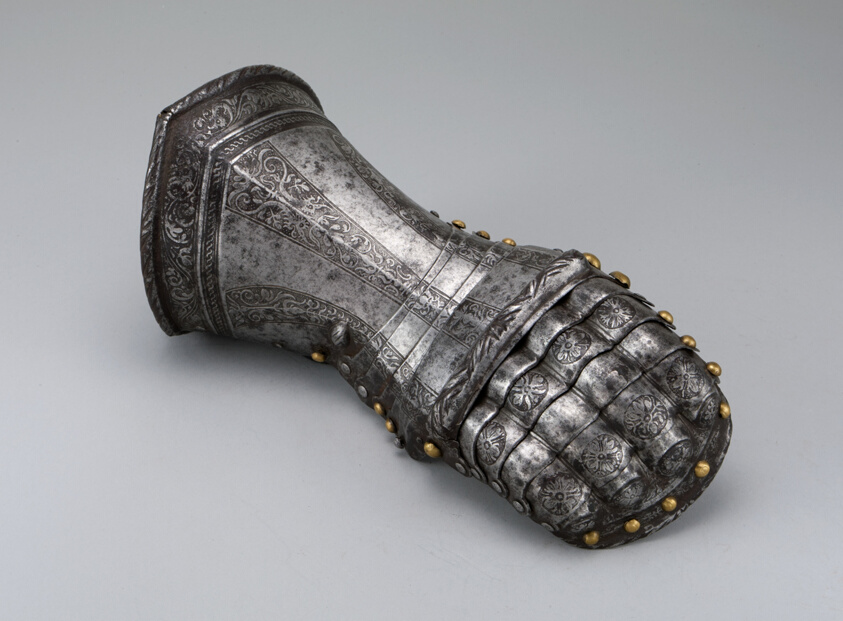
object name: Armor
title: Mitten Gauntlet for the Right Hand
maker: Southern German, probably Nuremberg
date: c. 1540/50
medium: Steel and brass, etched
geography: Nuremberg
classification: suit-gauntlet; armor; arms and armor